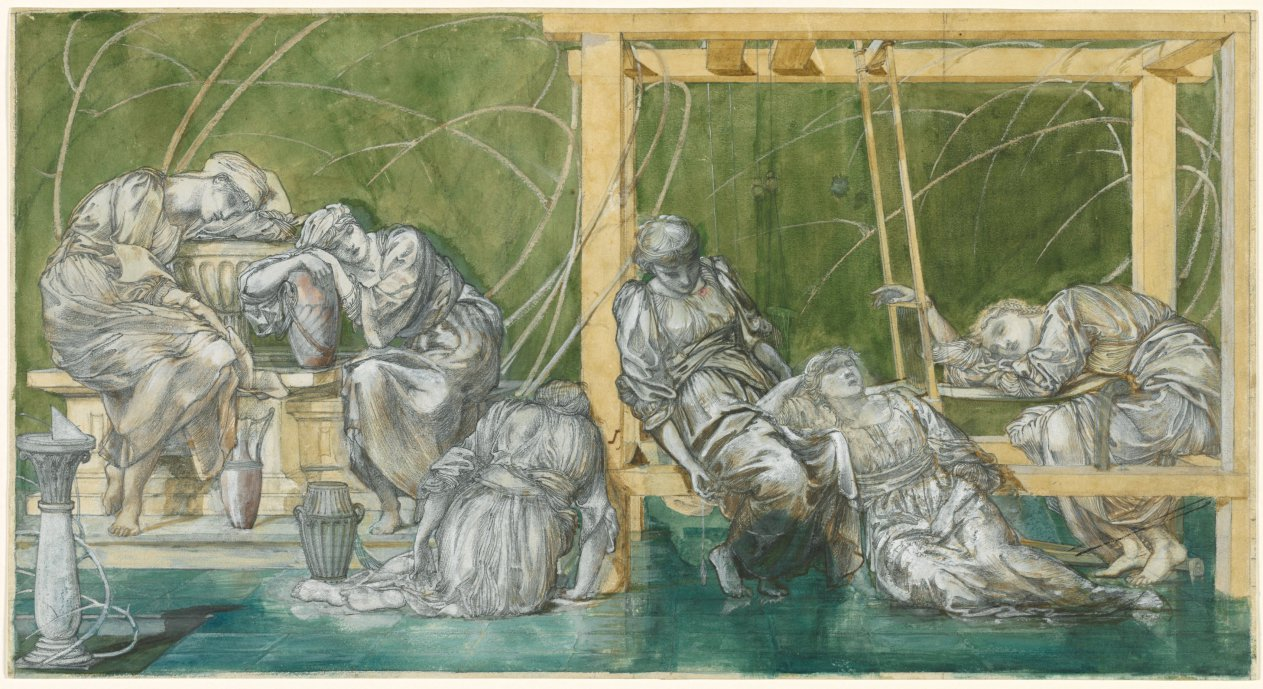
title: The Garden Court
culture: England, 19th century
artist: Edward Burne-Jones (British, 1833–1898)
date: 1870–75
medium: graphite and watercolor, heightened with white gouache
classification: Drawing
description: The story of Briar Rose (known popularly as "Sleeping Beauty") occupied Edward Burne-Jones on and off for much of his career. He completed three related sets of paintings of the subject over a 30-year period. This drawing probably relates to the first series, now in the Museo de Arte in Ponce, Puerto Rico. Here, vines twist in arabesques against a flat, chartreuse background, as though ensnaring the six servants asleep at a loom and well.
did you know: Art historian Andrea Wolk Rager has interpreted this drawing as related to Edward Burne-Jones's socialist beliefs, identifying the weaver at right in the work as a personification of artistic labor, dormant in industrialized Victorian society.